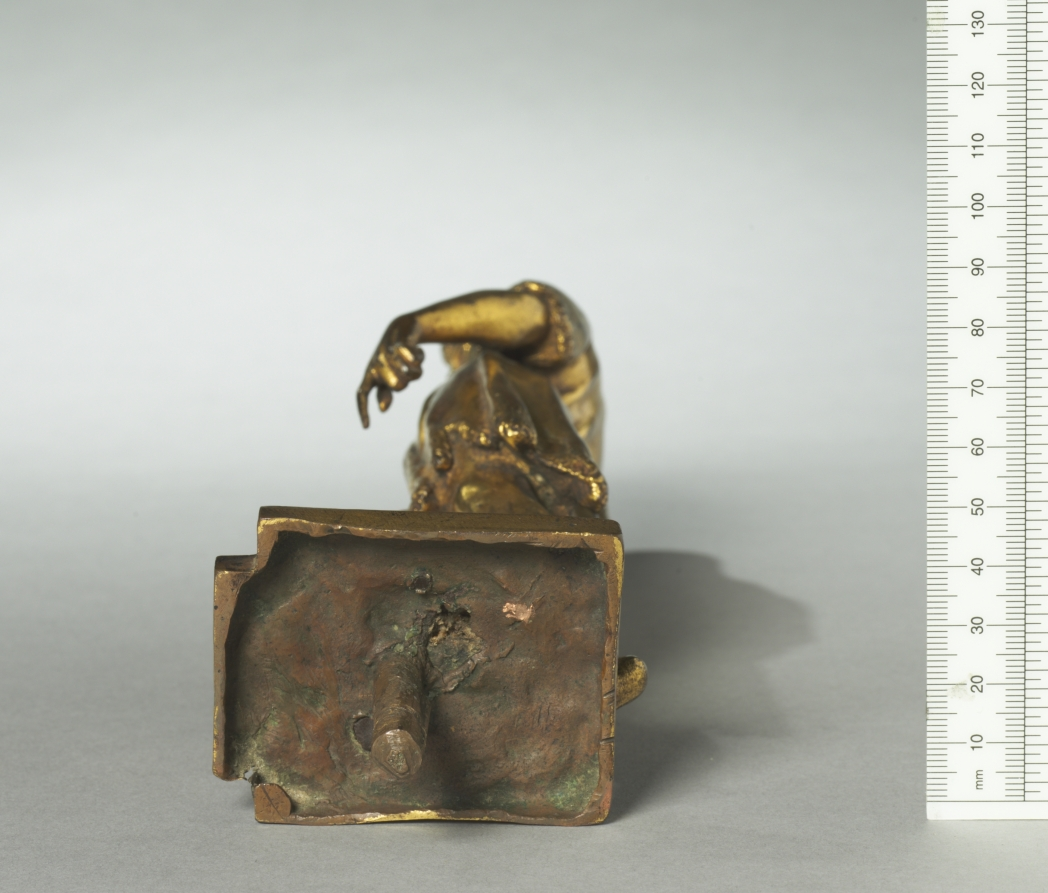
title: Saint John the Baptist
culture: Italy, Venice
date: c. 1550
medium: gilt bronze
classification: Sculpture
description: This small bronze, covered with gold, was produced in multiple versions. Saint John stands here, looking calm and composed, in a rather graceful pose. This piece has a sense of forward motion even though the figure appears to be leaning back in this stance. Elegant and subtle, this piece is a beautiful example of small cast Renaissance bronzes.